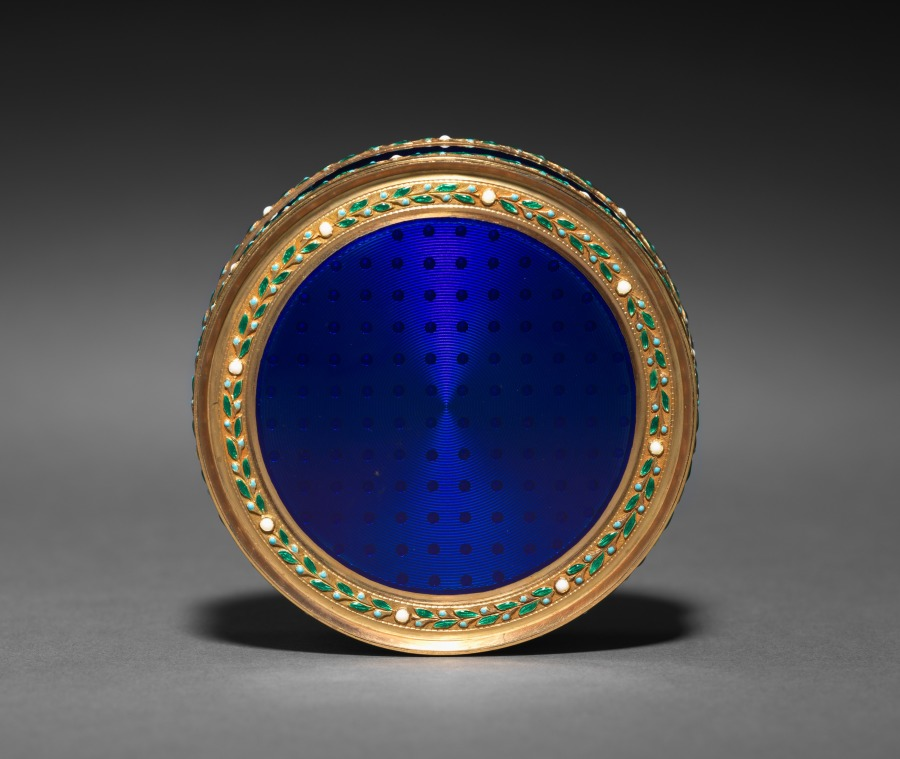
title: Box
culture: France, 18th century (style of Louis XVI)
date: 1700s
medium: gold and enamel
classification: Enamel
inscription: cupids holding book inscribed: Serment d'amour t-outs la vie.